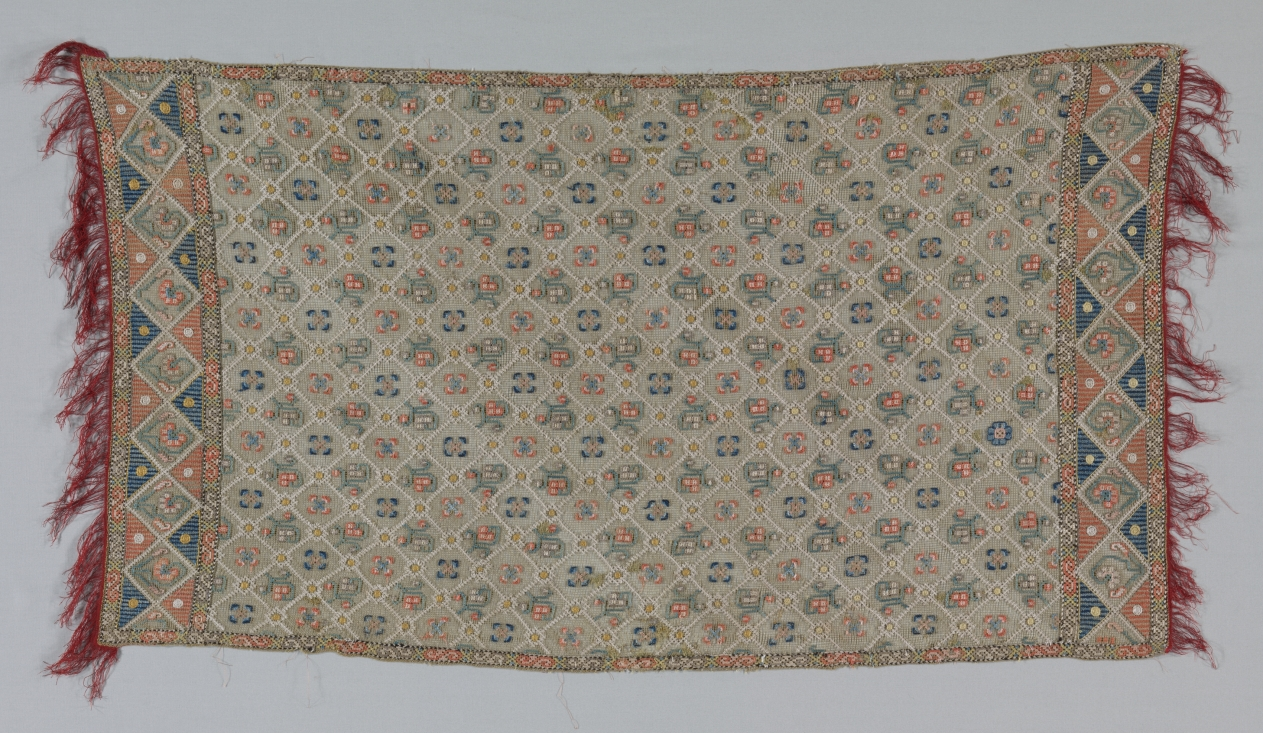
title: Embroidered Shawl (?)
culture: Turkey, 18th-19th century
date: 18th-19th century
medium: embroidery: silk on silk netting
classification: Embroidery